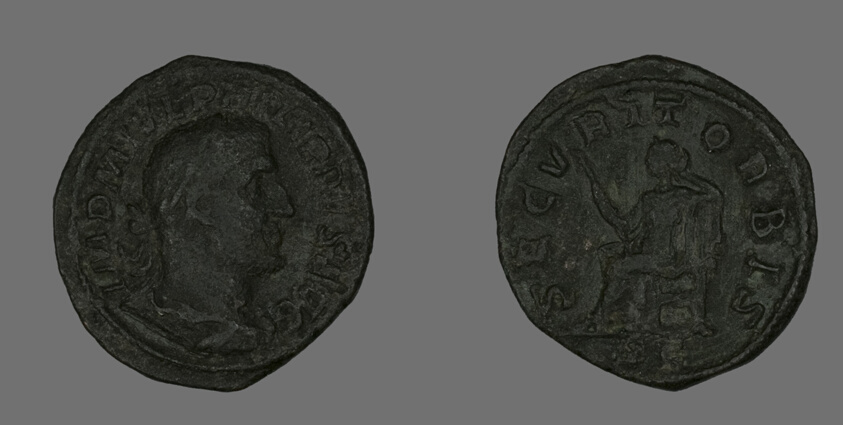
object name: Coin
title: Sestertius (Coin) Portraying Philip the Arab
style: roman (ancient, style or period), ancient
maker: Roman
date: 244-249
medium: Bronze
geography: Roman Empire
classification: coin; ancient art